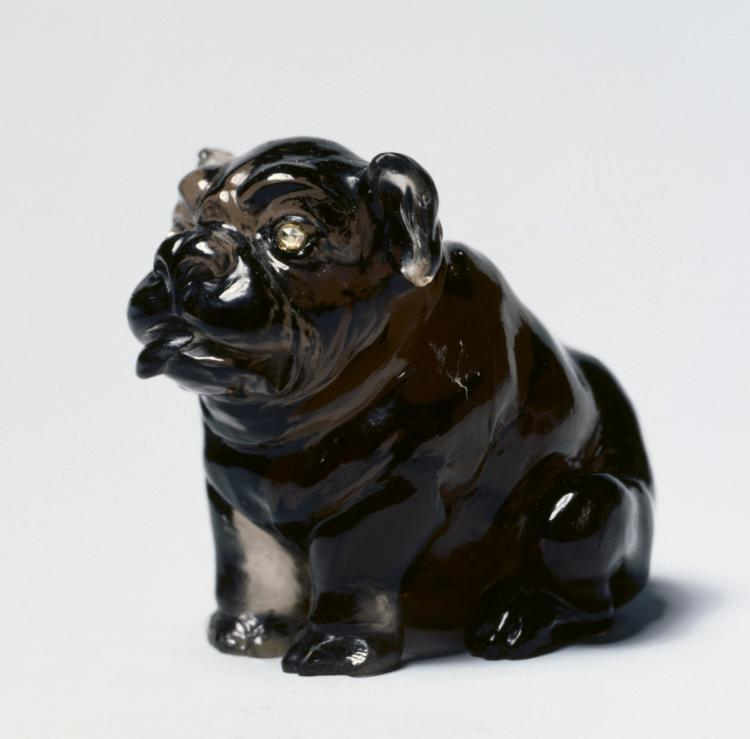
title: Bulldog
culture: Russia, St. Petersburg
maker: House of Fabergé (Russian, 1842–1918)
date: c. 1895–1915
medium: amethystine quartz, diamonds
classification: Miscellaneous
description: In creating luxurious accessories for a desk or tabletop, the House of Fabergé often used native hardstones such as multicolored agate and jasper, green nephrite, pink rhodonite, quartz, and rock crystal found in the Ural Mountains of western Russia. By paying careful attention to the unique colors and textures of the stones, Fabergé and his craftsmen brought them to life, turning smoky quartz into this figure of a seated bulldog, for example. The use of native materials also promoted Russian nationalism, which appealed greatly to the tsar and his family.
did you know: Fabergé's lapidaries carefully chose the stones to resemble the color and texture of the figure they were sculpting. The smoky quartz used for this bulldog was polished to resemble his dark shiny coat.